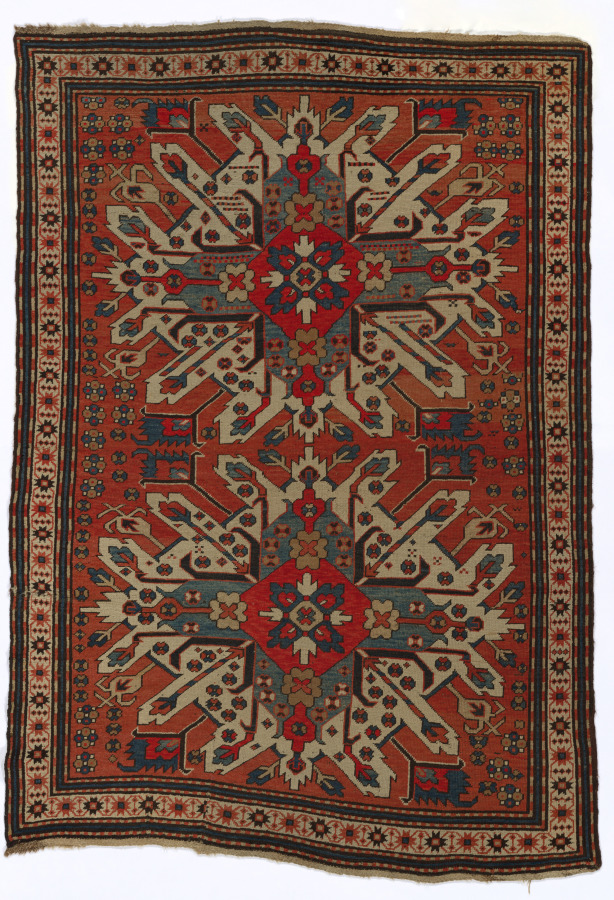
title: Carpet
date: 1800–1850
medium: Undyed wool: ground warp; dark brown wool: ground weft; dyed wool (polychrome): Ghiordes knotted pile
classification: Carpet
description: Nomadic groups, who moved across the grasslands and steppes between the Caucasus regions near the Caspian Sea to Central Asia and China, perfected the making of textiles, carpets, and other movable works of art. Carpets were woven from sheep’s wool to be strong and thick, and served as protection from the elements. This example is decorated with a double geometric sunburst motif.